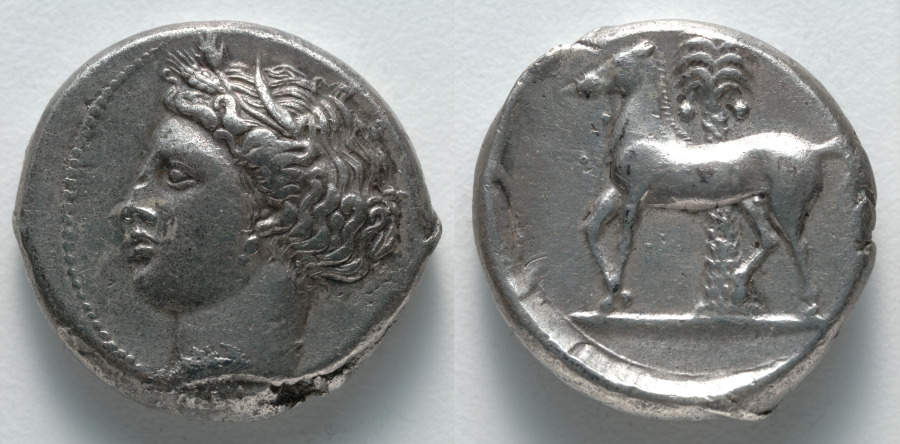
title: Tetradrachm: Head of Tanit-Persephone (obverse); Horse (reverse)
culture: Greek, Siculo-Punic, probably minted at Lilybaion (Sicily)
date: c. 350–320 BCE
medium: silver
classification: Coins